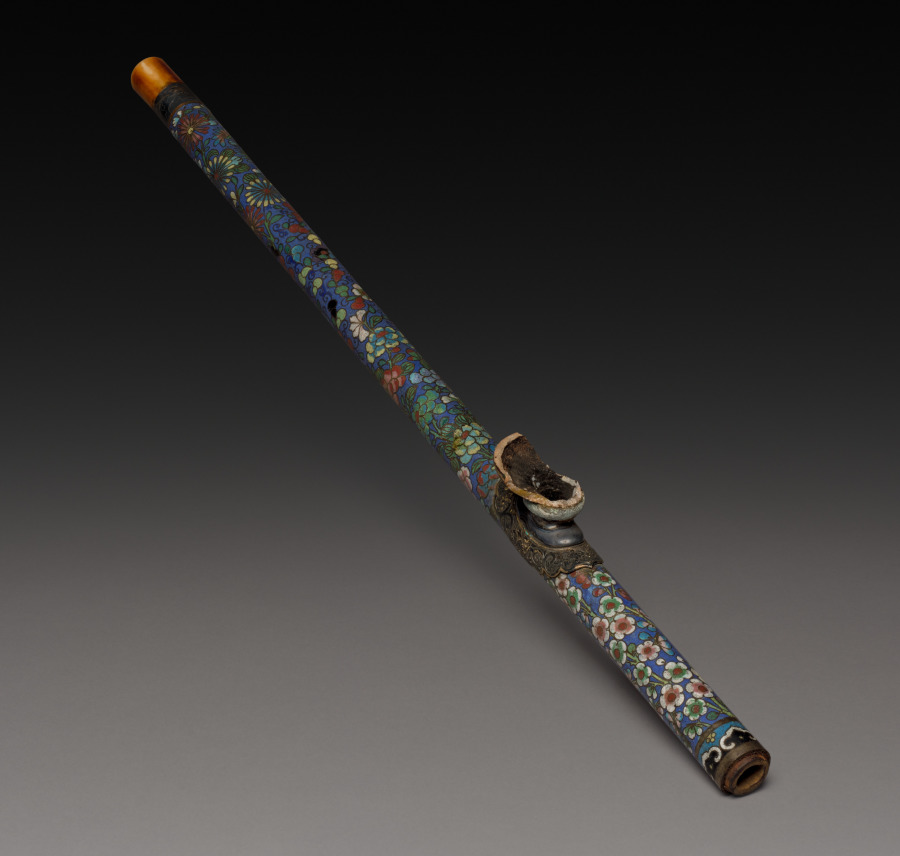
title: Opium Pipe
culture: China, Qing dynasty (1644-1911)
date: 1800s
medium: cloisonné enamel and ivory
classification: Miscellaneous